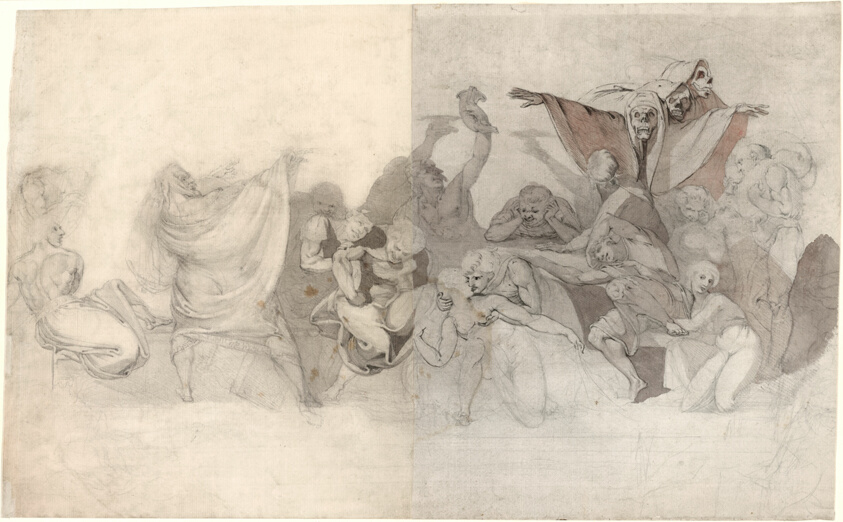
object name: Drawing and Watercolor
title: Triumph of Death: Three Skeletons Invading a Bacchanal Orchestrated by a Magician or an Evil Demon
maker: Henry Fuseli (Swiss, active in England, 1741-1825)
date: 1770–71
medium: Graphite, with brush and gray wash, on cream laid paper (left sheet); graphite, pen and black ink, and brush and reddish-gray wash, on ivory laid paper (right sheet), joined and laid down on ivory Japanese paper, edge mounted on cream card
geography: England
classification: pen and ink drawings; drawings (visual works); prints and drawing; paper